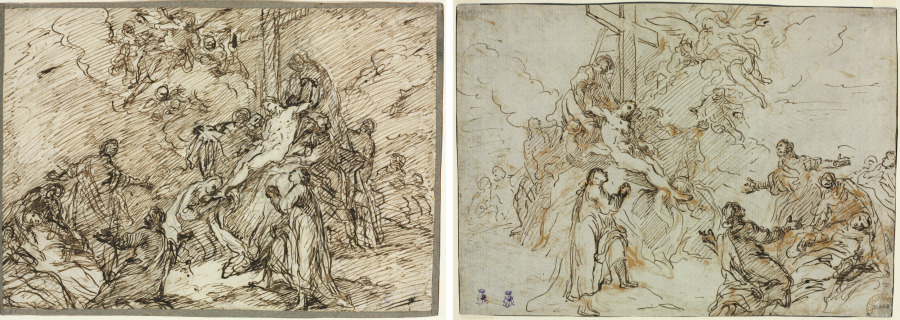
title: The Deposition (recto) and (verso)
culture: Germany, 18th century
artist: Christian Wink (German, 1738–1797)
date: second half 18th century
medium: pen and brown ink over black chalk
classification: Drawing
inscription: lower left, on paper strip mounted to perimeter of drawing, in graphite: 31